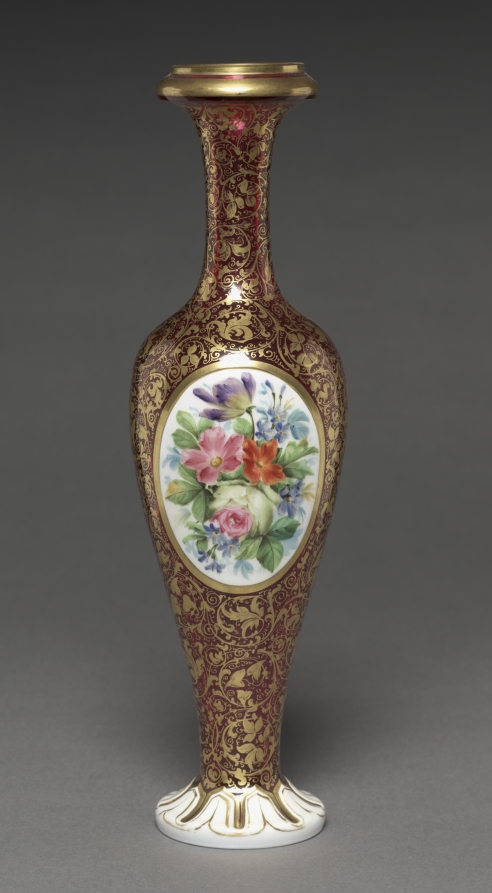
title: Vase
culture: Bohemia (?), 19th century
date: 1840–1860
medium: glass with enamel and gilt decoration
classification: Glass